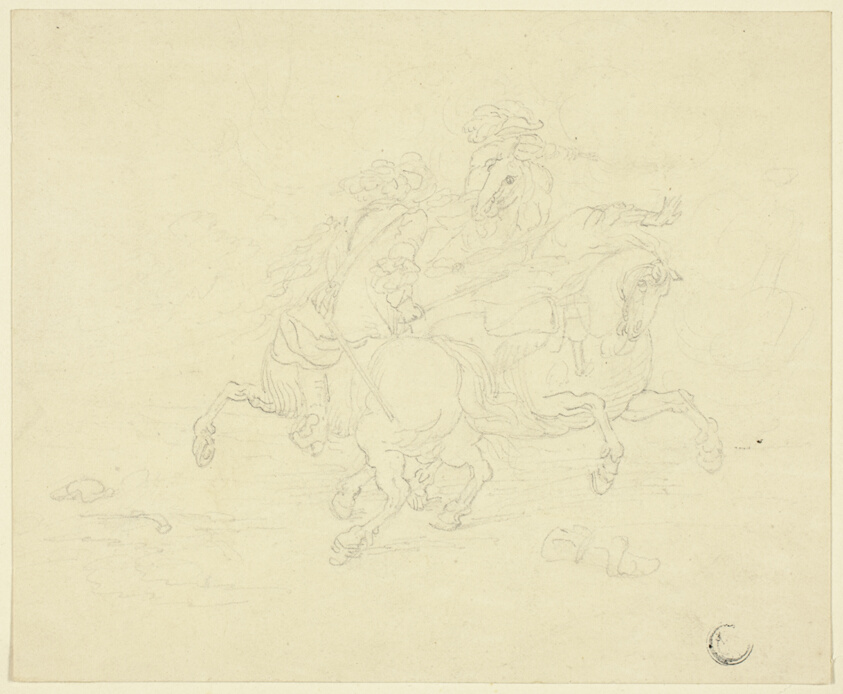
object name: Drawing and Watercolor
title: Skirmish between Two Cavalrymen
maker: Attributed to Francesco Simonini (Italian, 1686-1753); or August Querfurt (German, 1696-1761)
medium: Black chalk, on tan wove paper, laid down on tan wove card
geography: Italy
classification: graphite; drawings (visual works); prints and drawing